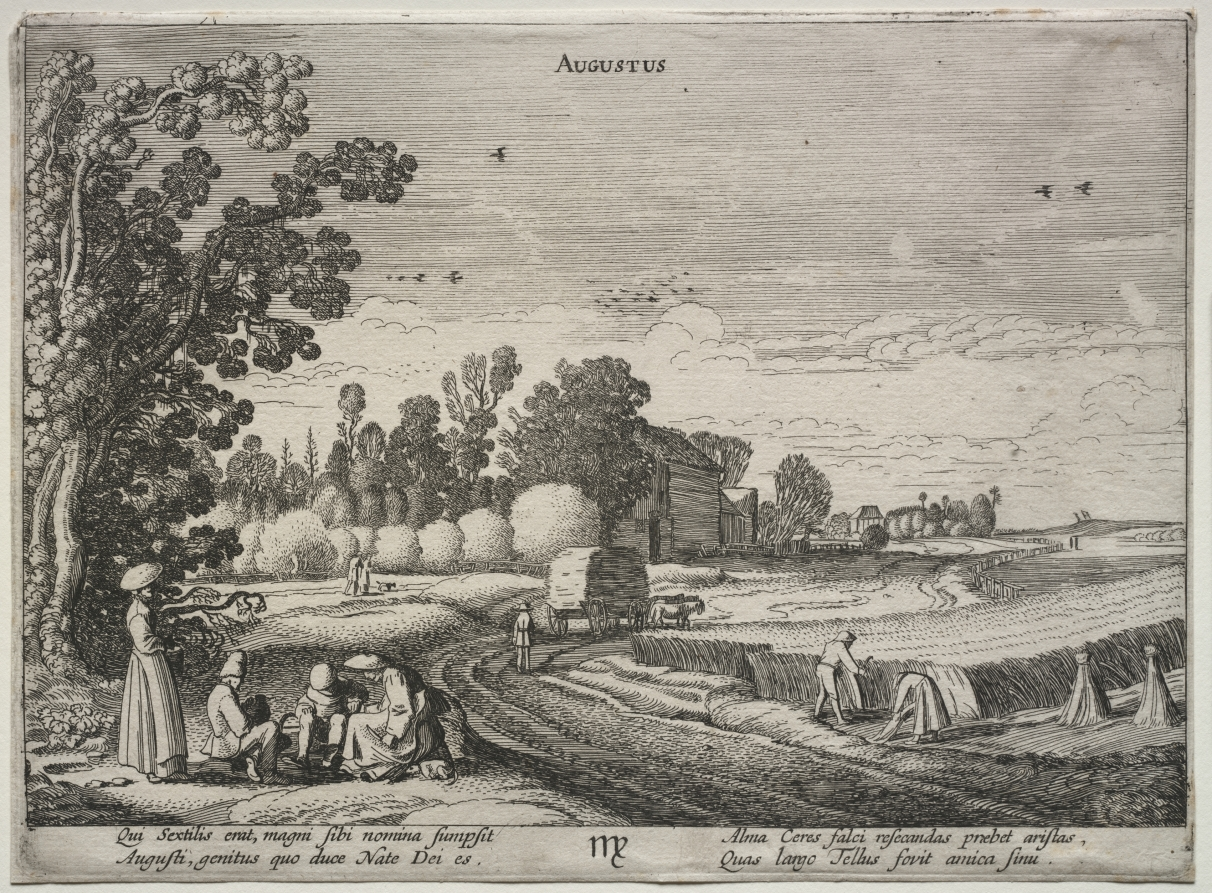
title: The Twelve Months: August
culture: Netherlands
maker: Jan van de Velde II (Dutch, 1593–1641)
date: 1608–18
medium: etching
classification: Print